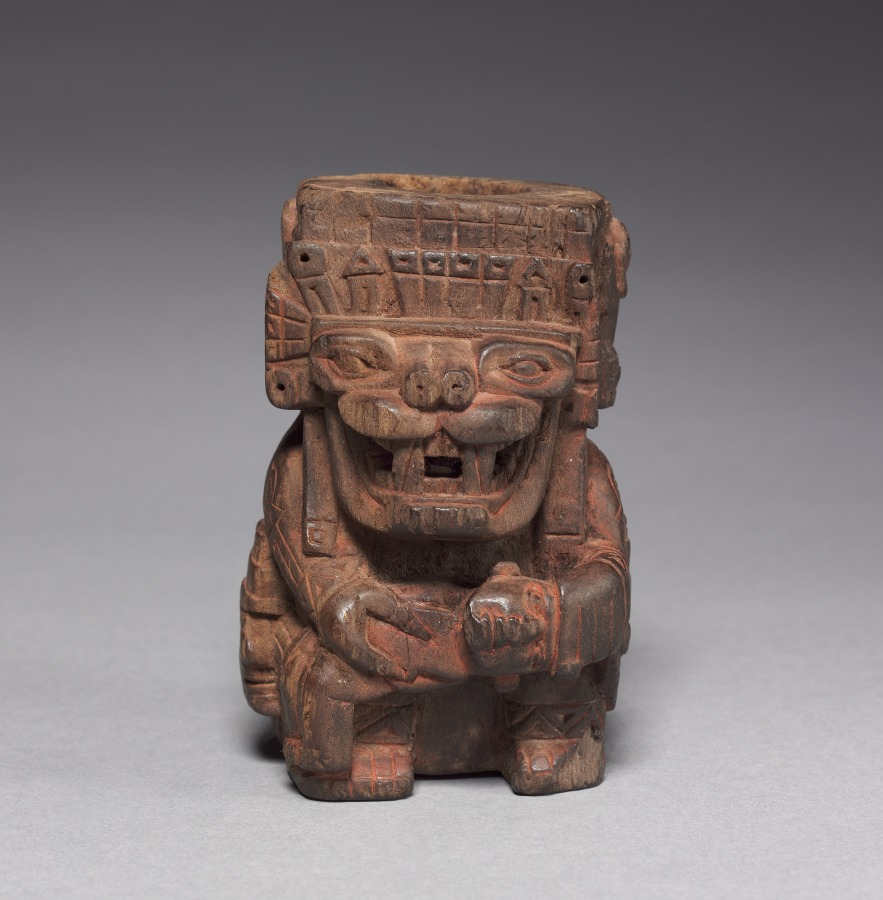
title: Sacrificer Container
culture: Central Andes, Wari style (600-1000)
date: 770–890 (radiocarbon date, 95% probability)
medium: wood and cinnabar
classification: Wood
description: This container assumes the shape of a magnificent, feline-headed, supernatural sacrificer who draws a knife across the throat of the human it holds in its lap. Severed human heads hang from the feline's belt and dangle by the trachea at the back of its headdress. Sacrifice had a place in Wari religious practice, probably as an unusual and exceptionally precious offering made to entice the benevolence of cosmic forces. Indeed, colonial-period Andean people believed that death was a prerequisite for the renewal of the world.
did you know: Traces of cinnabar, a toxic mercuric sulfide, are visible on the container's surface.